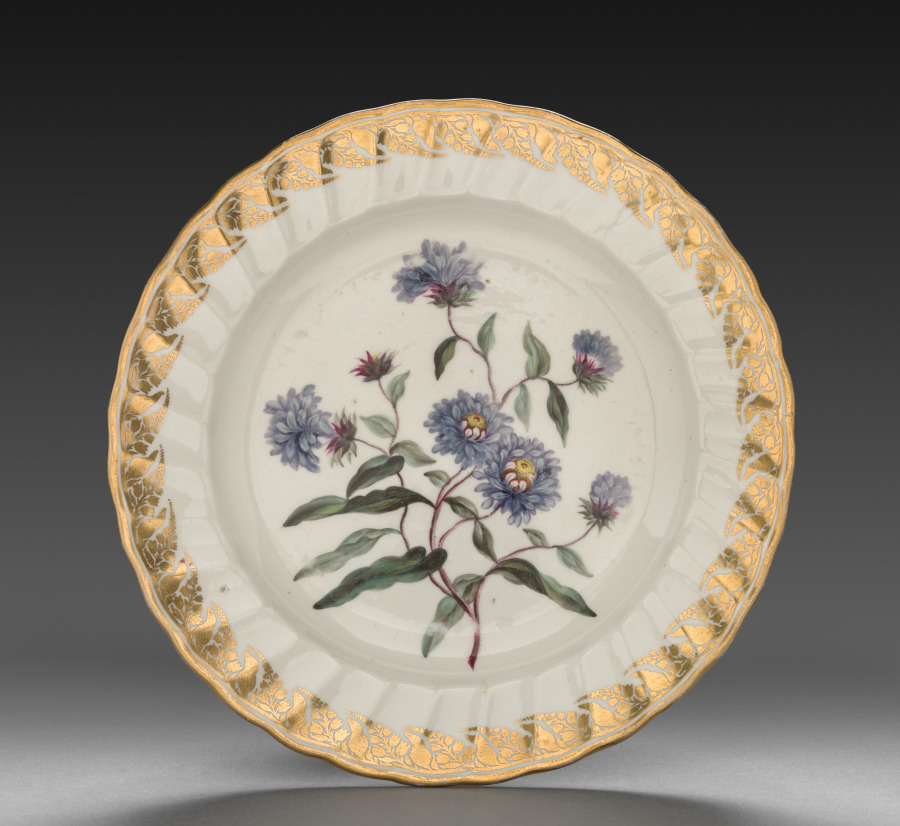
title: Plate from Dessert Service: Tall Blue Aster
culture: England, Derby, 18th century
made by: Derby (Crown Derby Period) (British)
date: c. 1800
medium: porcelain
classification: Ceramic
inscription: inscribed in blue on back: Aster Alpinus Elata/Tall Blue Aster./crown/crossed batons and dots/D/115. Near edge: 9.